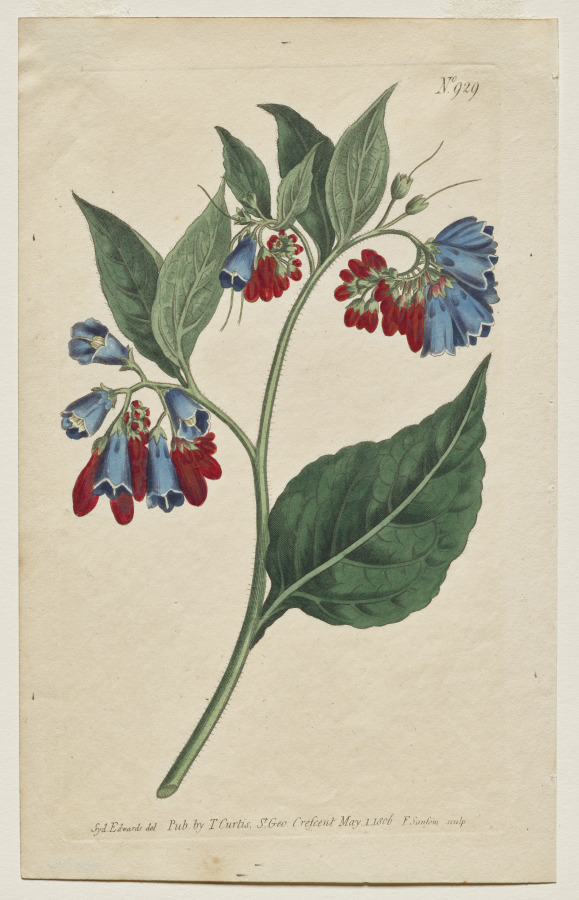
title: The Botanical Magazine or Flower Garden Displayed: Plate 929, Symphyum Asperrim. Prickley Comfrey. [Symphytum asperum]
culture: England, 19th century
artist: Francis Sansom (British, 1815)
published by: Thomas Curtis (British, 1846–1920)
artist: after Sydenham Edwards (British, 1768–1819)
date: 1806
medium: engraving with hand coloring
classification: Print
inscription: upper right corner, engraved: No. 929 lower margin, engraved: Syd. Edwards del. Pub. By T. Curtis, St. Geo. Crescent May 1, 1806 F. Sansom sculp.